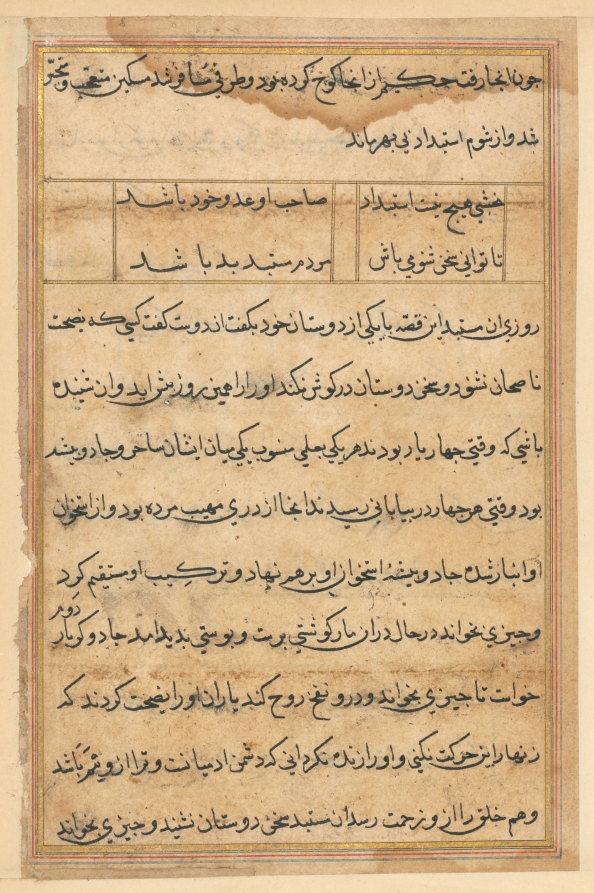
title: Page from Tales of a Parrot (Tuti-nama): text page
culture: Mughal India, court of Akbar (reigned 1556–1605)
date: c. 1560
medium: gum tempera, ink, and gold on paper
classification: Painting